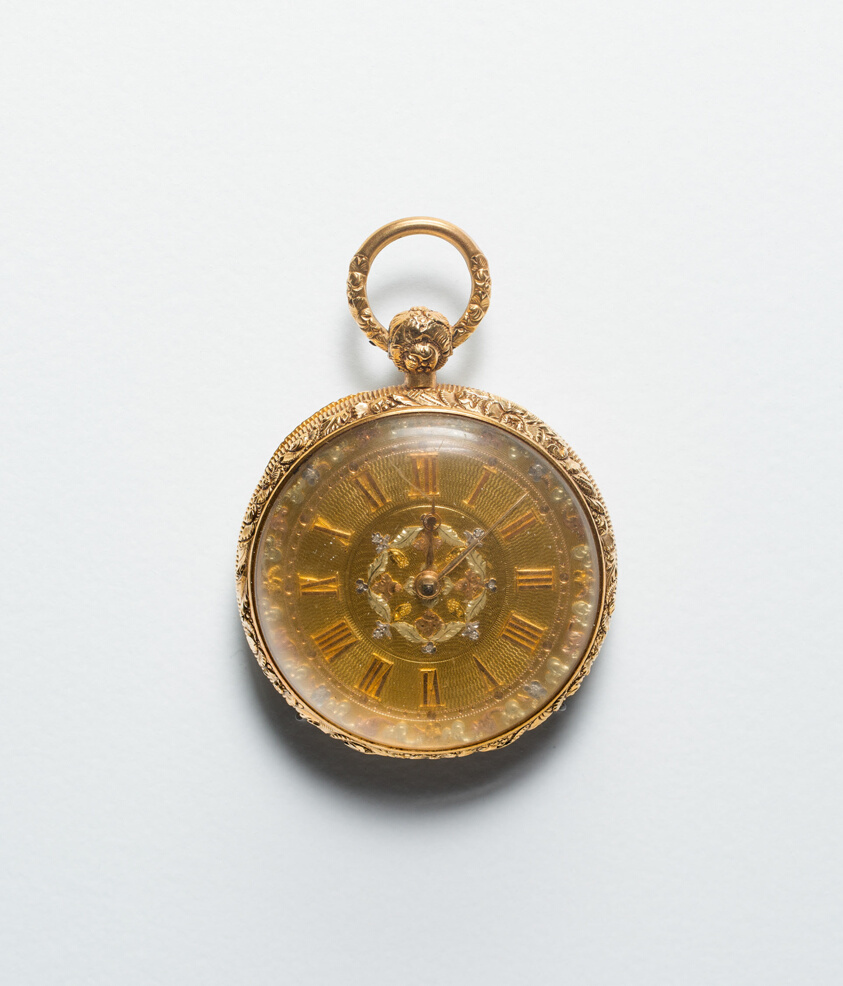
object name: Metalwork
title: Lever Watch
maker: England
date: Mid 19th century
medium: Gold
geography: England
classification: metal; watch; european decorative arts; metalwork